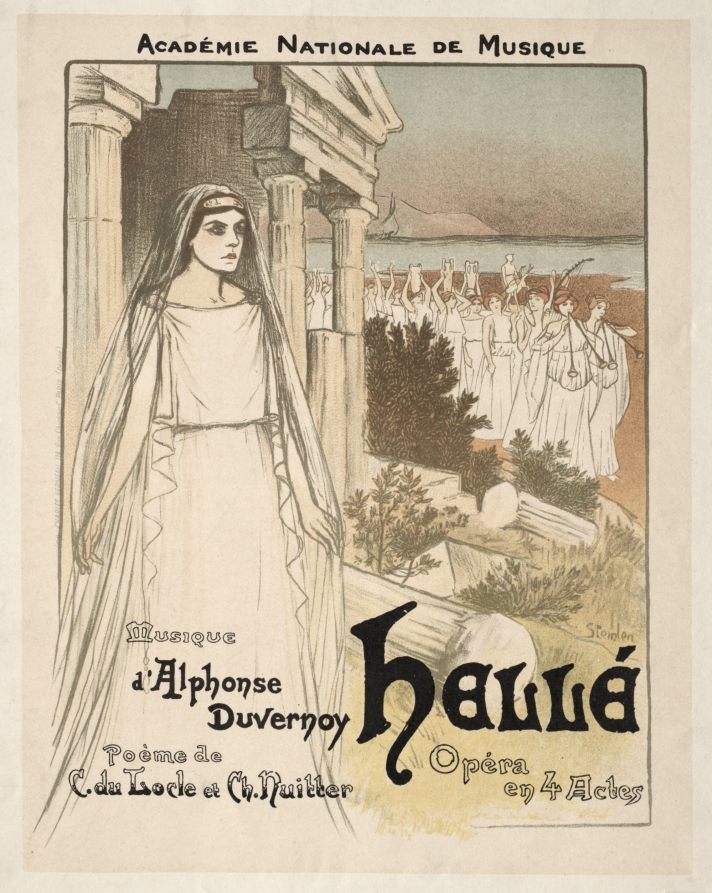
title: Hellé - Opéra en 4 actes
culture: Switzerland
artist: Théophile Alexandre Steinlen (Swiss, 1859–1923)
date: 1896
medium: lithograph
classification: Print